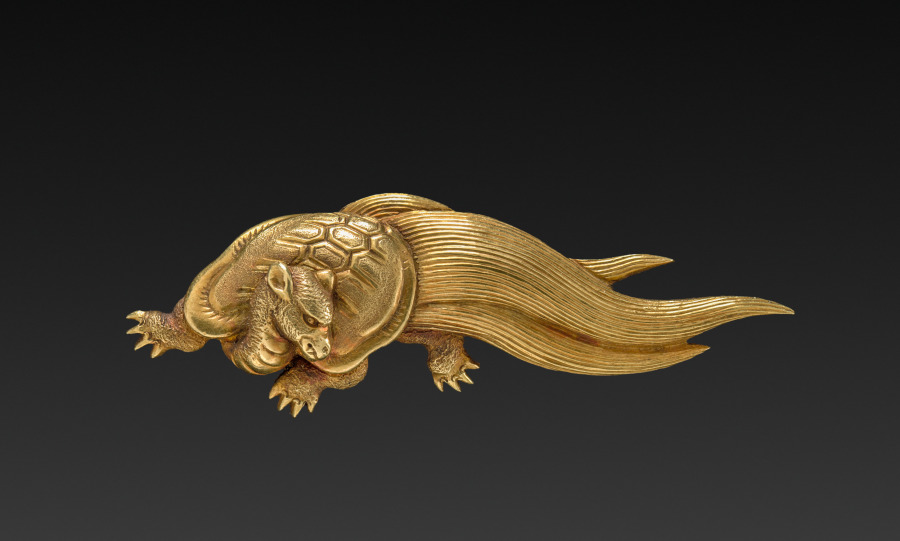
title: Tortoise-shaped Sword-Grip Ornament (Menuki)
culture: Japan, possibly Edo period (1615-1868)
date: c. 1615–1868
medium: gilt bronze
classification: Metalwork